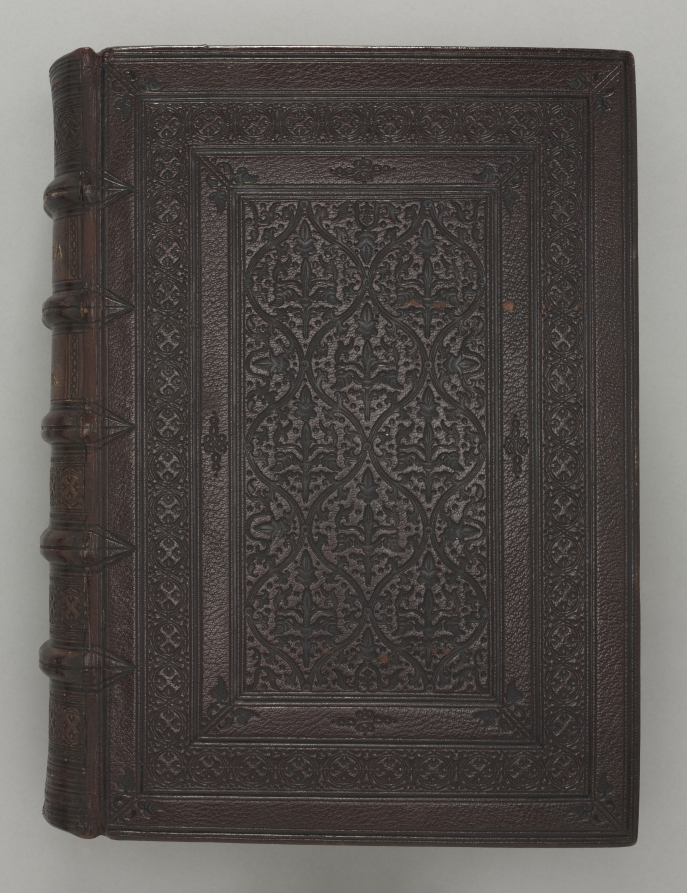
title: Gothic Bible (Vulgate)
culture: Southern France, Toulouse or Avignon, 13th century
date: c. 1275–1300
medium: ink, tempera, and gold on vellum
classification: Bound Volume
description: Biblical manuscripts were highly prized and important possessions of churches, monasteries, cathedral schools, and universities throughout medieval Europe. The biblical texts were known as the vulgate, the translations made by Saint Jerome in the fourth century from Hebrew and Greek into Latin, which became the definitive and official Latin version of the Roman Church. In the 13th century, the bible was, for the first time, produced as a single volume with an officially sanctioned sequence to its books and chapters as illustrated by this example. The very extensive decoration of this bible is arranged hierarchically to indicate the relative importance of the various texts so that full or almost full-page initials mark the openings of the first prologue, Genesis, and the first Gospel; historiated initials mark the beginning of each book and illuminated initials mark the Prologues.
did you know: Original texts of the Old and New Testaments were written in Greek and Hebrew.